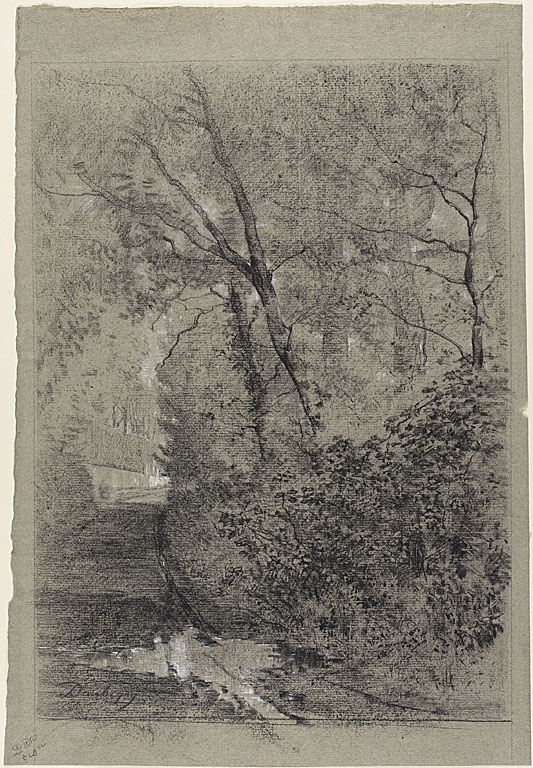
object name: Drawing and Watercolor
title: Path in the Woods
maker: Charles François Daubigny (French, 1817-1878)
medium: Black chalk, with black pastel, heightened with white chalk, on blue-gray laid paper with blue fibers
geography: France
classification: chalk; drawings (visual works); prints and drawing